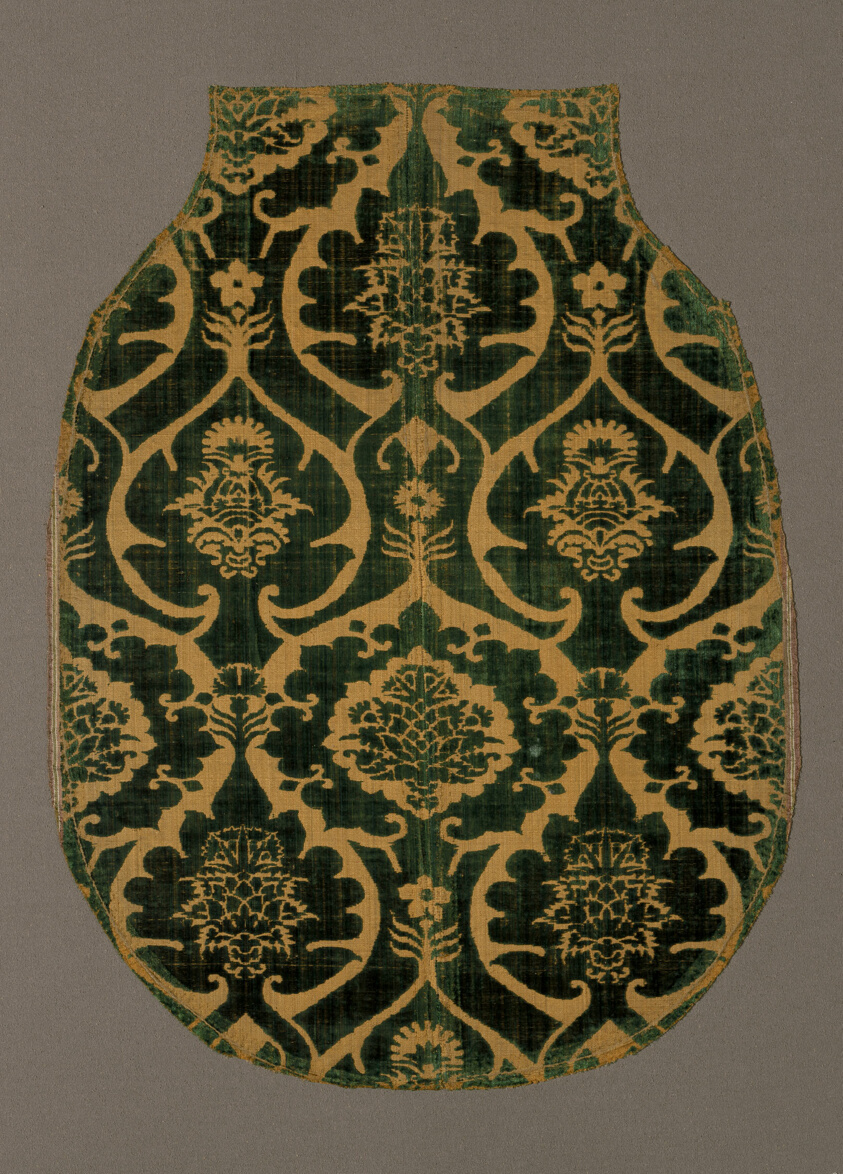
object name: Textile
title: Chasuble (Fron only)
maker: Italy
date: 15th century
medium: Silk, warp-float faced 4:1 satin weave with supplementary pile warps forming cut voided velvet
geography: Italy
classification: textile; weaving - velvet; liturgical